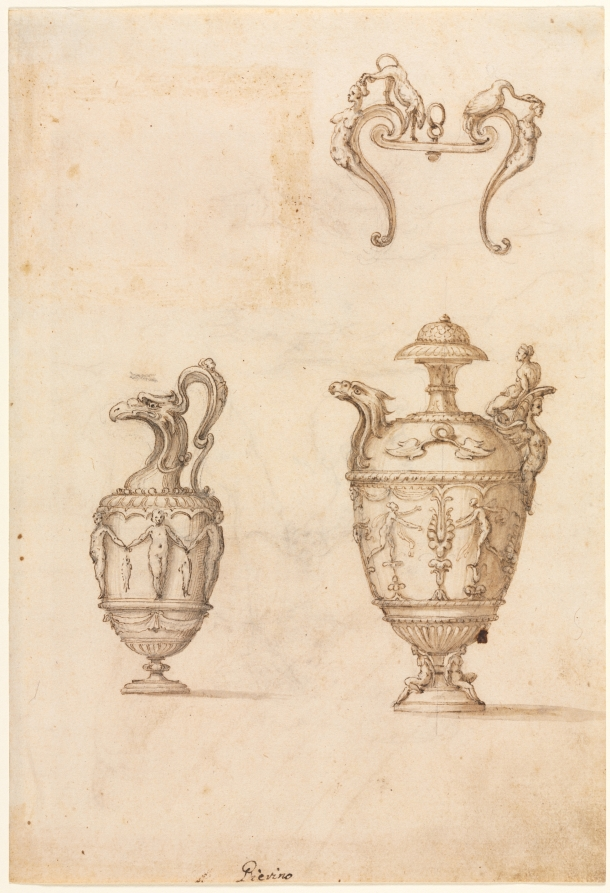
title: Design for Two Vases and an Ornament (recto)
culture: Italy, 16th century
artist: Luzio Romano (Italian, active 1528–75)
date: mid 1500s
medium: pen and brown ink and brush and brown wash, with brush and gray wash (left vase), over black chalk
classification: Drawing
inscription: lower center, in brown ink: Pierino